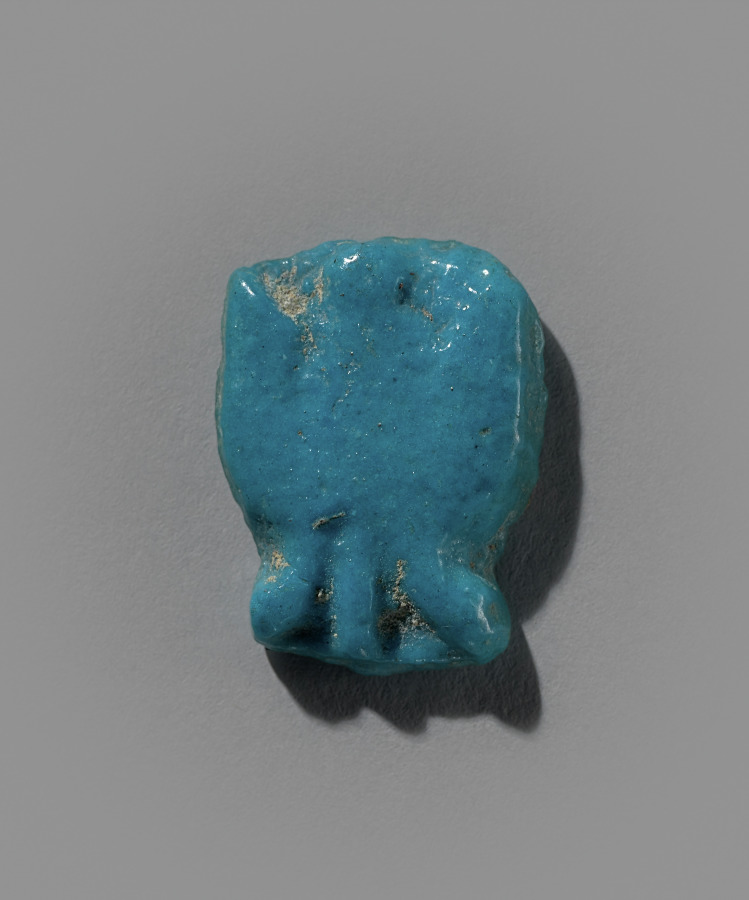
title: Food Model Amulet: Brace of Duck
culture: Egypt, New Kingdom (1540–1069 BCE), Dynasties 19–20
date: 1295–1069 BCE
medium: turquoise faience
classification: Amulets